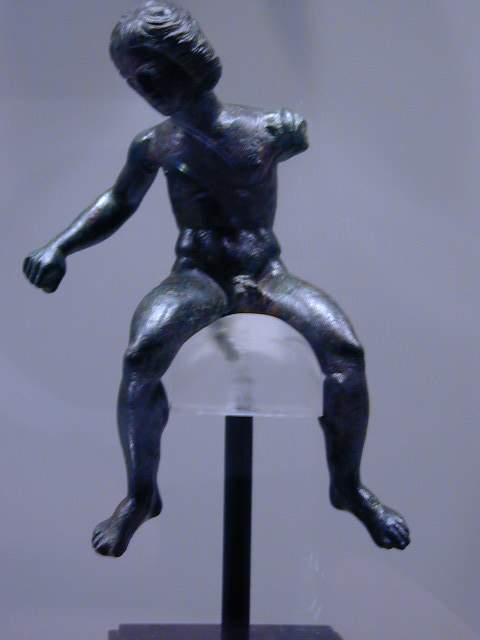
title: Rider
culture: Greece, perhaps from workshop of Tarentum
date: c. 400–375 BCE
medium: bronze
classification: Sculpture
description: Once mounted with pins upon his horse (now lost), this statuette depicts a young man participating in an equestrian race. The rider’s distinctive equipment is still barely visible: his right hand clutches the base of a goad to urge on his horse, and the first pleat of a cloak, the youth’s only covering, lays over his left shoulder.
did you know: Without stirrups, this rider’s heels turn inward to control his mount by pressing its flanks.